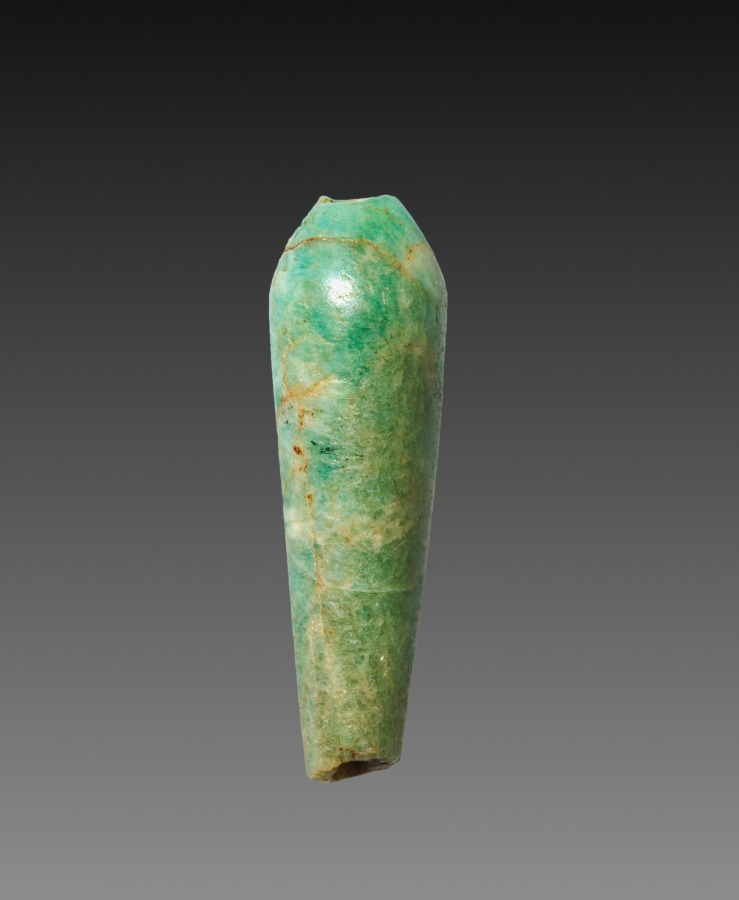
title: Teardrop-Shaped Beads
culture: Egypt, Middle Kingdom (2040–1648 BCE), Dynasty 12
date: 1980–1801 BCE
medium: feldspar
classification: Jewelry